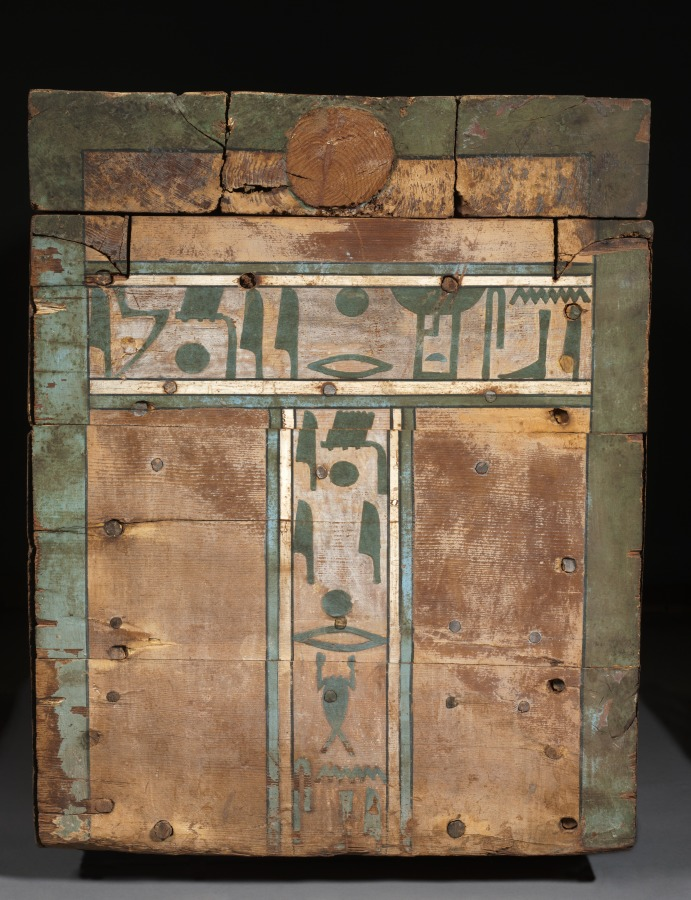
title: Coffin of Senbi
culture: Egypt, Meir, Middle Kingdom, mid-Dynasty 12, reign of Amenemhat II to Sesostris III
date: c. 1918–1859 BCE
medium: gessoed and painted cedar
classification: Funerary Equipment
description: The most common type of coffin during the Middle Kingdom took the shape of a rectangular box with lid. The mummy inside was placed on his left side, facing east, his head behind the two magical eyes. These—in the shape of human eyes, to which have been added the markings of a falcon's head—were supposed to enable him to behold the rising sun, reborn daily. The long horizontal inscriptions are prayers to Anubis (god of embalming) and Osiris (god of the dead) for offerings of food and drink and other items necessary for survival in the afterlife. The short vertical inscriptions place him under the protection of the gods of earth, sky, air, and moisture, as well as various funerary deities.